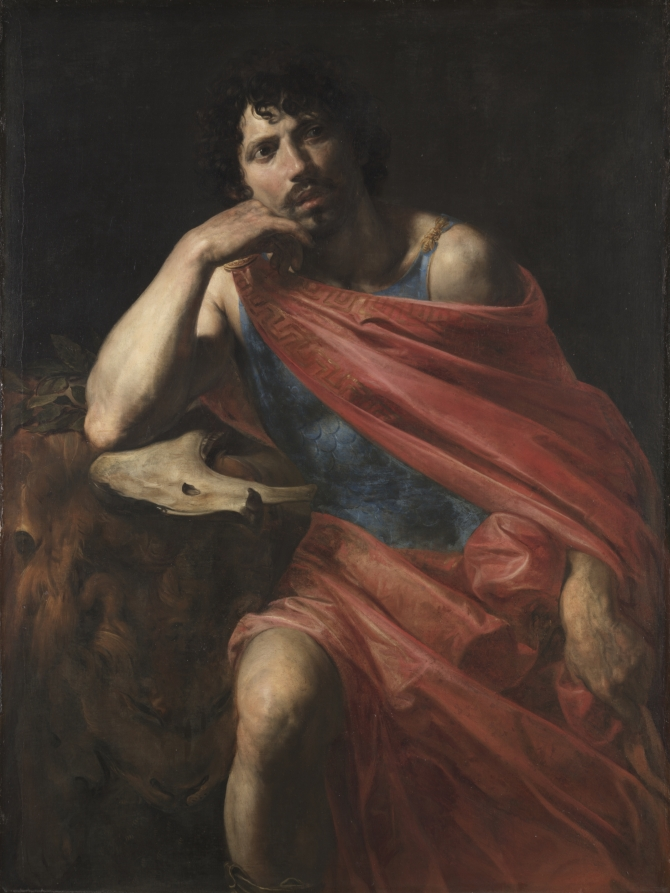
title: Samson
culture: France, 17th century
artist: Valentin de Boulogne (French, 1591–1632)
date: 1630–31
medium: oil on canvas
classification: Painting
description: The Old Testament hero Samson rests his head on his hand in a pensive, even melancholic pose. Objects on the table recall two of his heroic deeds: he killed a lion with his bare hands, and liberated the Israelites by slaughtering a thousand Philistines with a donkey’s jawbone. Samson’s cuirass, or breastplate, is joined at the shoulder by a clasp in the form of two bees—the emblem of the Barberini family, who commissioned the painting around 1630. In 1627, the Barberini had engaged Valentin to paint another biblical hero, David victorious with the head of Goliath; the canvas depicting Samson was designed to be its pendant.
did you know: The figure of Samson was likely a self-portrait of the artist.